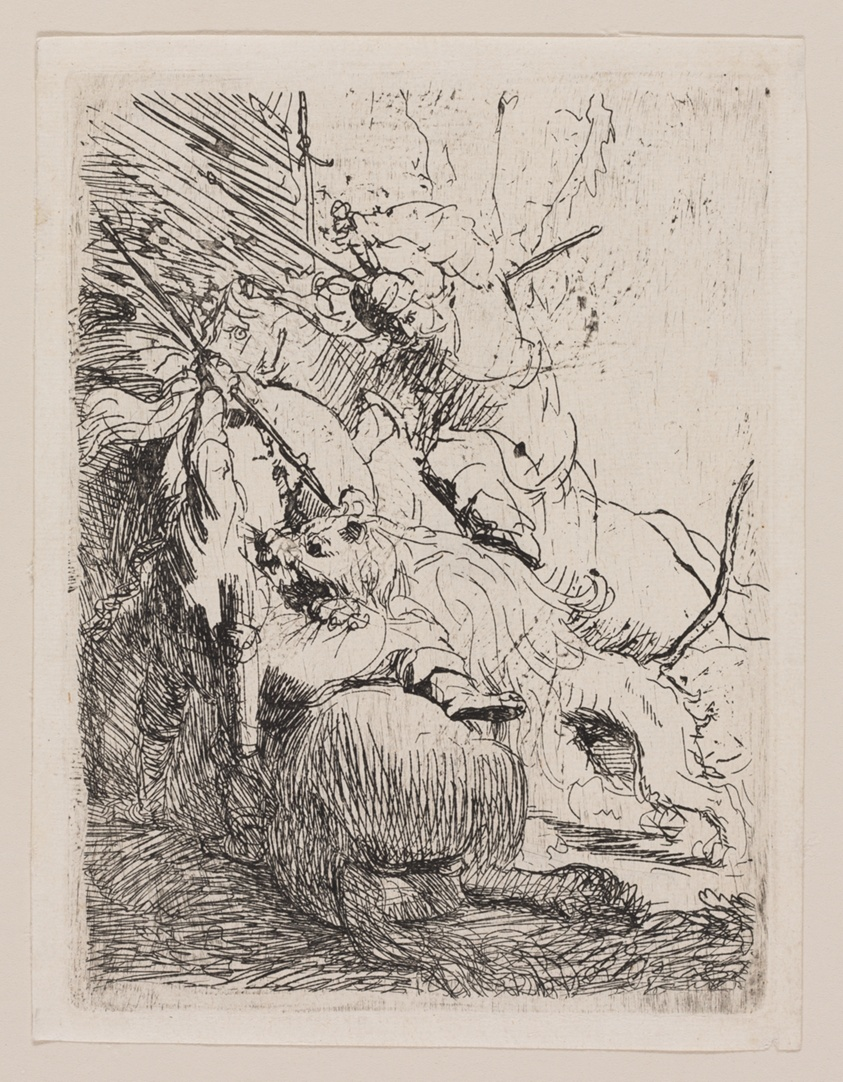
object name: Print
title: The Small Lion Hunt (With One Lion)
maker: Rembrandt van Rijn (Dutch, 1606-1669)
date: c. 1629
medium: Etching on paper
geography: Holland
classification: etching; print; prints and drawing; paper